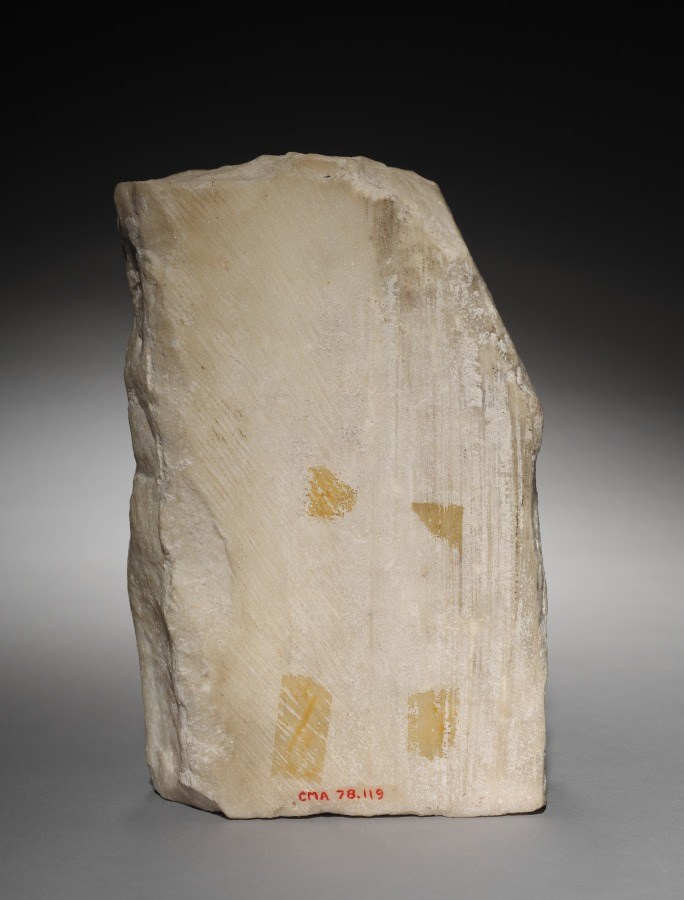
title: Nude Figure in a Niche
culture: France, late 19th-early 20th century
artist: Théodore Rivière (French, 1857–1912)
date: c. 1870 – 1912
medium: white marble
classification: Sculpture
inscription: Signed lower right: "T. Rivière"